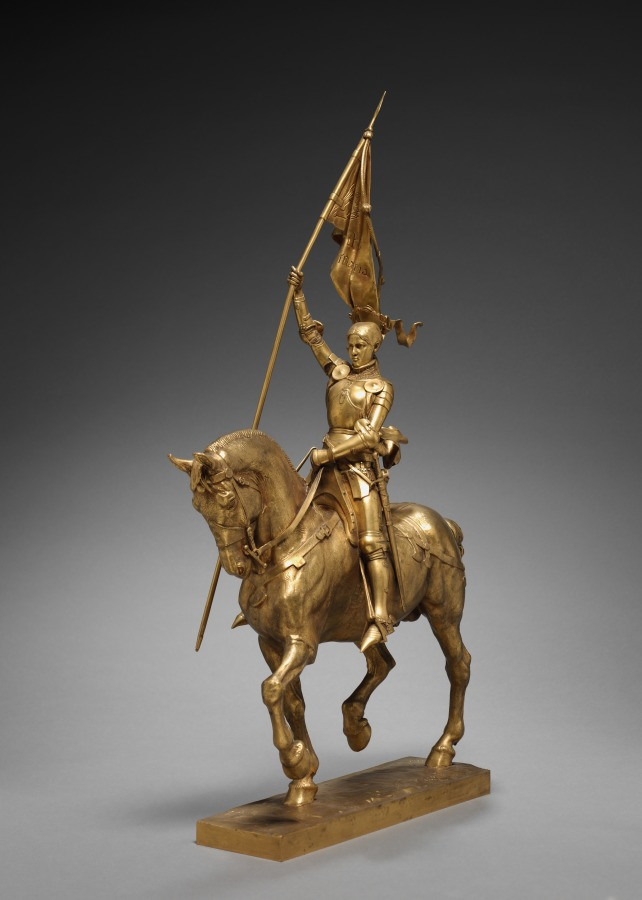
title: St. Joan of Arc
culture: France, 19th century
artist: Emmanuel Fremiet (French, 1824–1910)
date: 1874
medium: gilt bronze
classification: Sculpture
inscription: signed: "FREMIET"; inscription on flag: "IHS, MARIA."